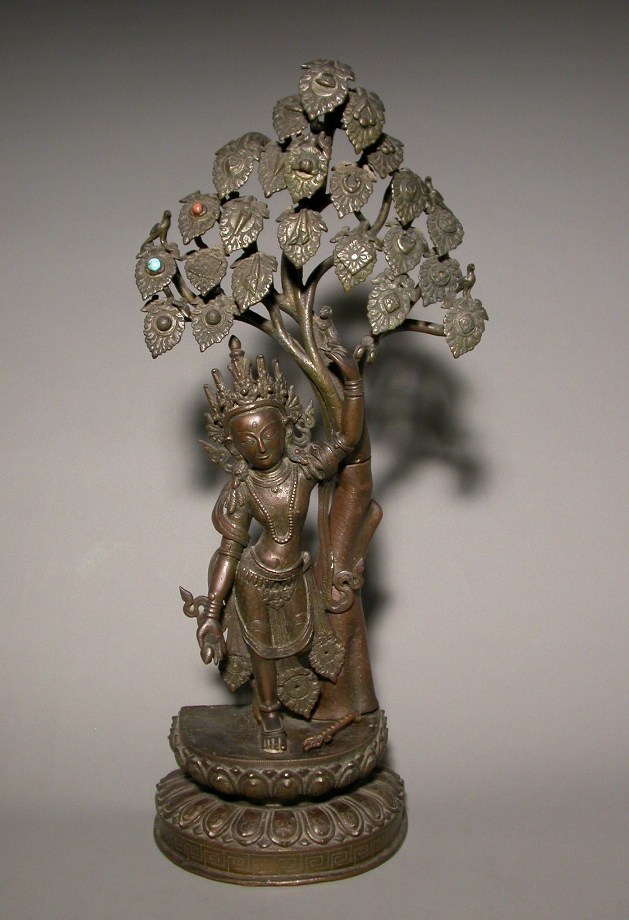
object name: Sculpture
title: Wish-Fullfilling Gem Lord of the World (Chintamani Lokeshvara)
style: Himalayan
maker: Nepal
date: 19th century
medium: Bronze with coral and turquoise inlay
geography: Nepal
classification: bronze; metal; sculpture; asian art